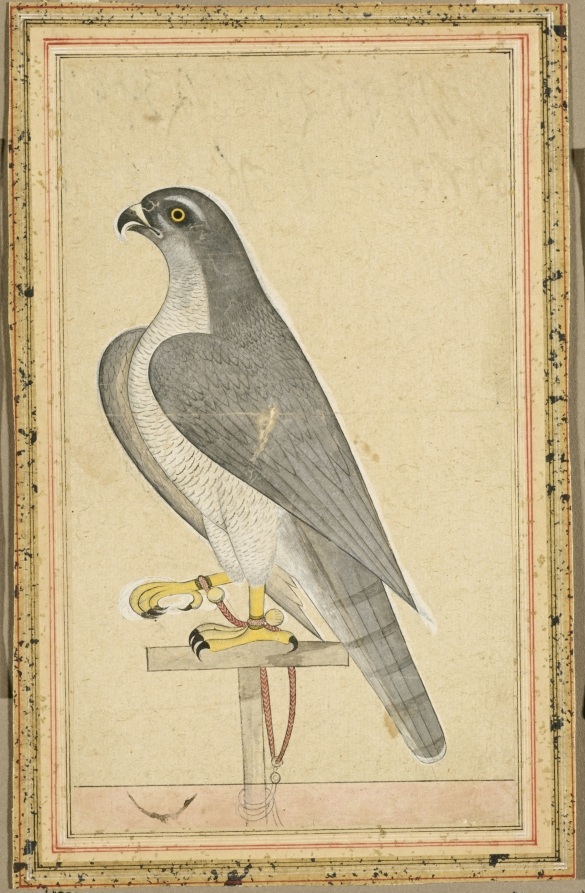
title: Falcon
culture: Northern India, Pahari kingdoms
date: c. 1770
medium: Gum tempera and gold on paper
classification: Painting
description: The imperial Mughal practice of keeping portraits of animals was adopted by art patrons and collectors in small states and kingdoms under the umbrella of the Mughals. Falconry, the sport of hunting small game with a bird of prey, was a popular activity among the highest ranks of Mughal royalty. The falcon depicted in this painting appears to be a peregrine. Cords with bells keep the trained hunting bird tethered to its roost.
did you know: Indian artists used white-out, white paint, to cover mistakes and make changes.